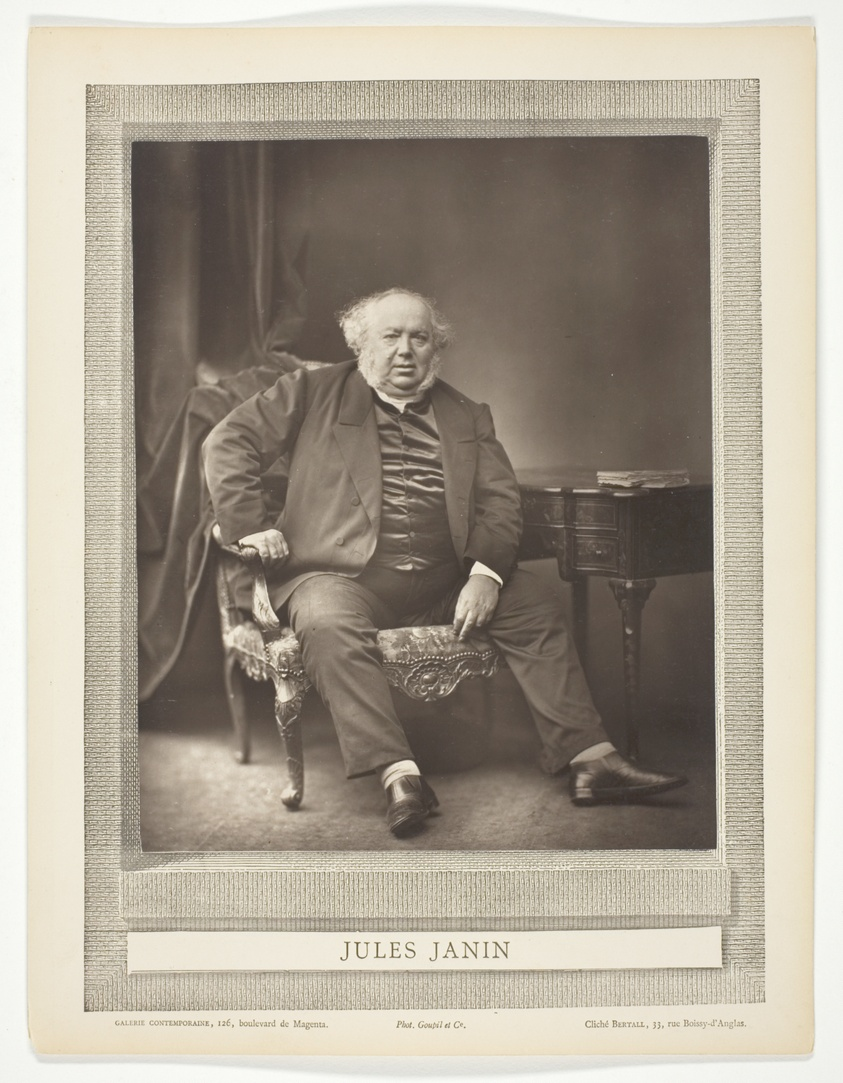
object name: Photograph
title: Jules Janin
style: 19th century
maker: Bertall (French, 1820–1882)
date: 1875/77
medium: Woodburytype, from the periodical “Galerie Contemporaine Littéraire, Artistique” (1877), volume 2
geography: France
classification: woodburytype; photomechanical process; photography; photograph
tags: Collected by Hugh Edwards, Contemporaine Littéraire